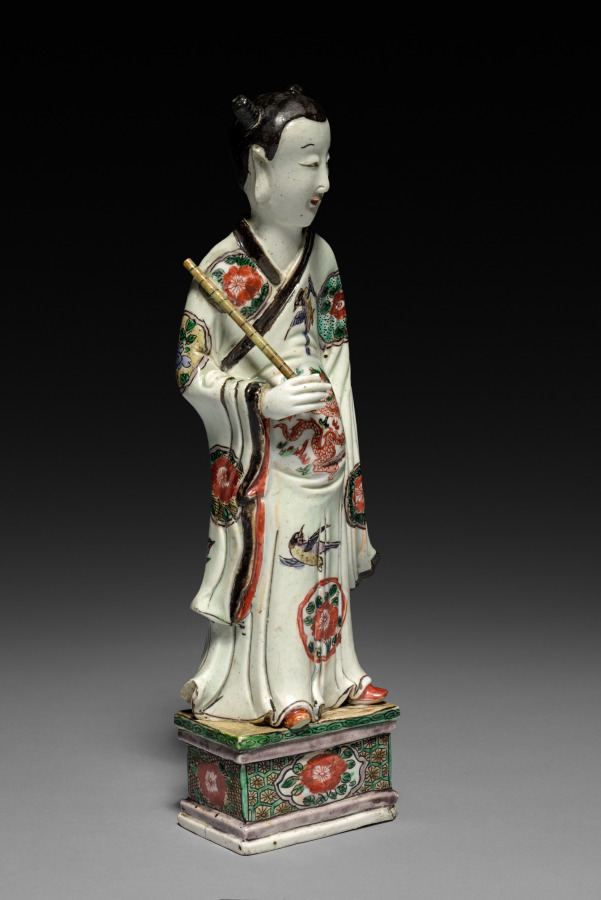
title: Daoist Immortal Han Xiangzi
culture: China, Jiangxi province, Jingdezhen kilns, Qing dynasty (1644-1911), Kangxi reign (1662-1722)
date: 1662–1722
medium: porcelain with famille verte overglaze enamel decoration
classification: Ceramic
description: One of the Eight Immortals, Han Xiangzi was said to be the nephew of the famous Tang dynasty poet Han Yu (768–824). He is usually shown as a young boy holding a flute. Han is wearing a white robe decorated with peonies, hinting at his identity as the patron of florists and his legendary ability to make peonies bloom in winter. A four-clawed dragon, a decorative motif typically used for imperial nobility and certain high-ranking officials, decorates Han’s robe.